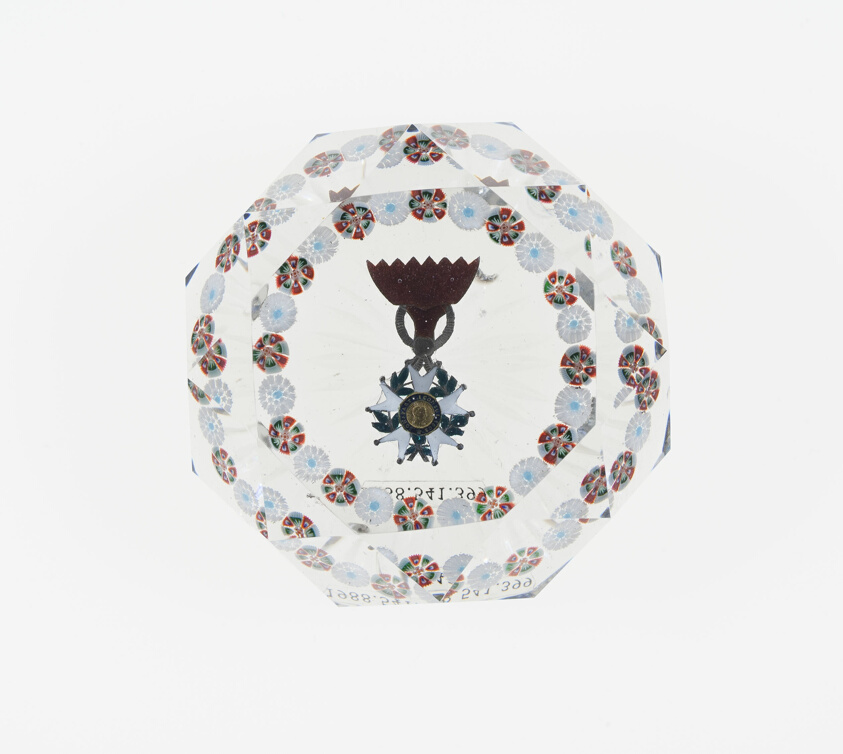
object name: Glass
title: Paperweight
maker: Baccarat Glassworks (Cristalleries de Baccarat); Lorraine, France, founded 1764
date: Mid 19th century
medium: Glass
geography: Baccarat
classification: paperweight; glass